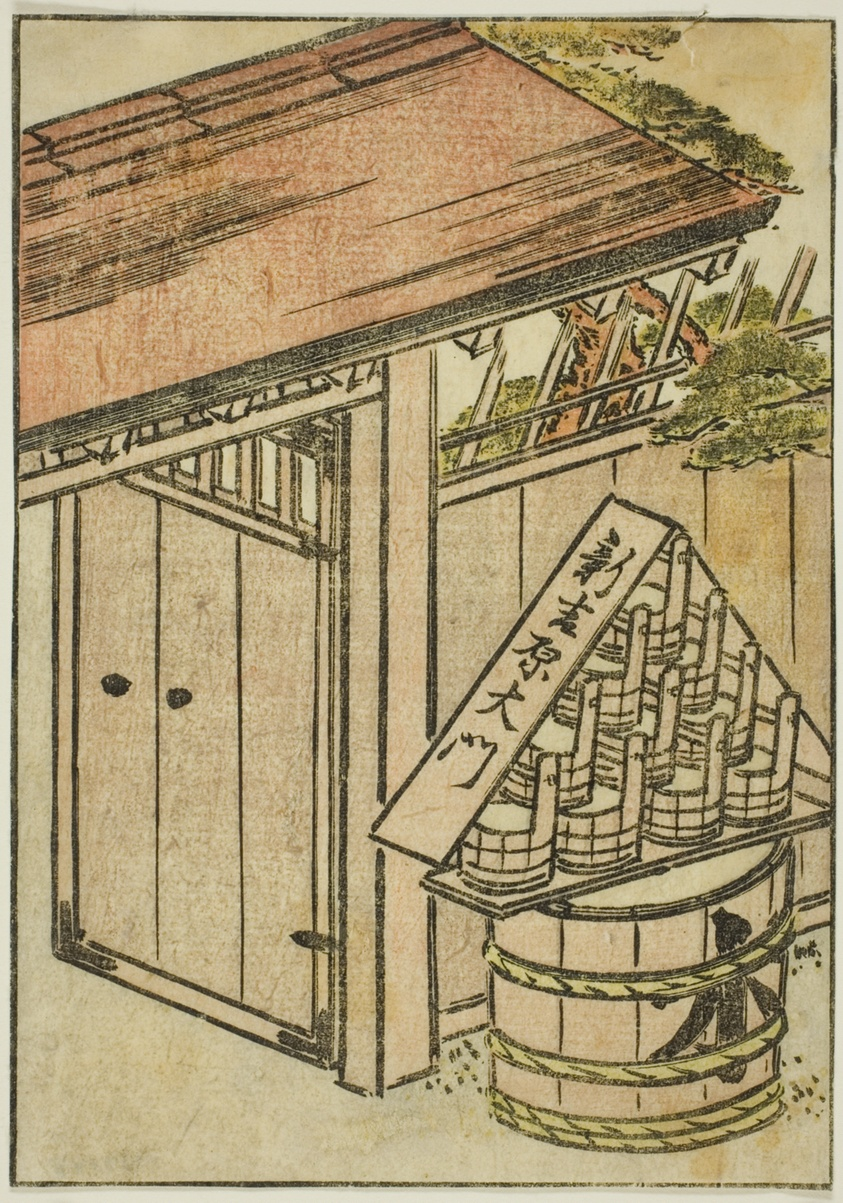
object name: Print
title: The Gate of the New Yoshiwara, frontispiece from the third volume of "Mirror of Beautiful Women of the Pleasure Quarters (Seiro bijin awase sugata kagami)"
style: Japanese (culture or style)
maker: Katsukawa Shunsho; Japanese, 1726-1792; Kitao Shigemasa; Japanese, 1739-1820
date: 1776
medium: Color woodblock print; illustration cut from a book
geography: Japan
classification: woodblock print; print; asian art